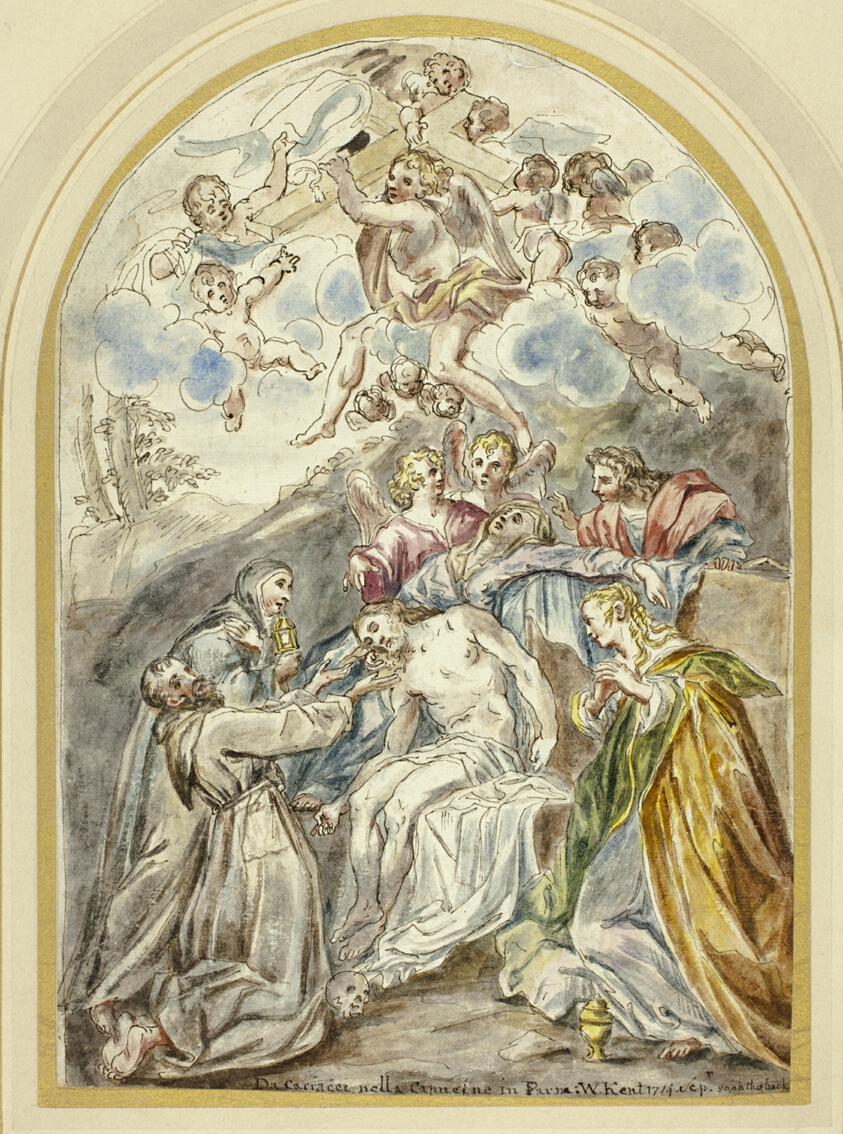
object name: Drawing and Watercolor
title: Chiesa dei Cappuccini Parma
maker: William Kent (English, 1685-1748); after Annibale Carracci (Italian, 1560-1609)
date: September 1714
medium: Pen and brown ink, with brush and watercolor, over traces of black chalk, on ivory wove paper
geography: England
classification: watercolor; paper; drawings (visual works); prints and drawing